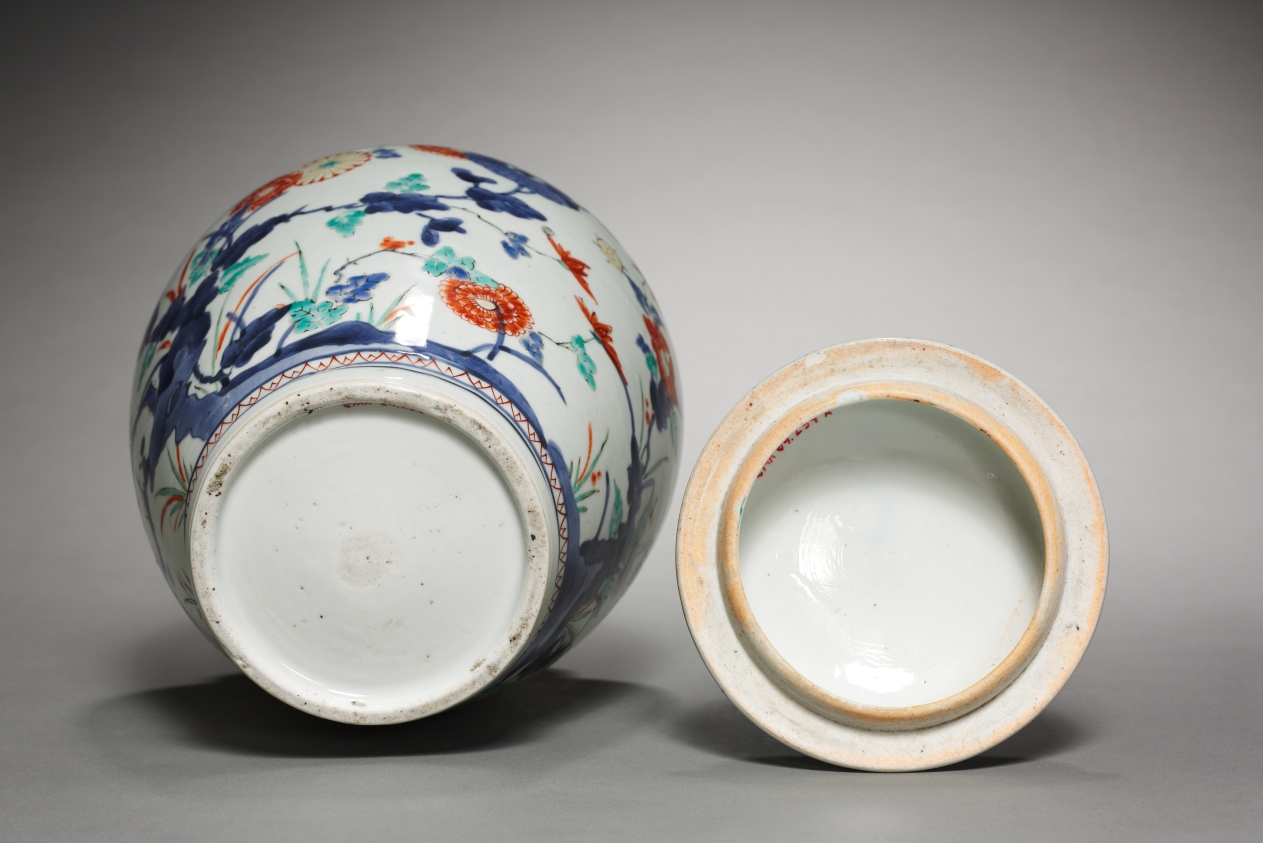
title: Covered Jar with Chrysanthemums, Peonies, and Plum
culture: Japan, Edo period (1615–1868)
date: late 1600s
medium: porcelain with underglaze blue and overglaze color enamel (Hizen ware, Kakiemon type)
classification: Ceramic